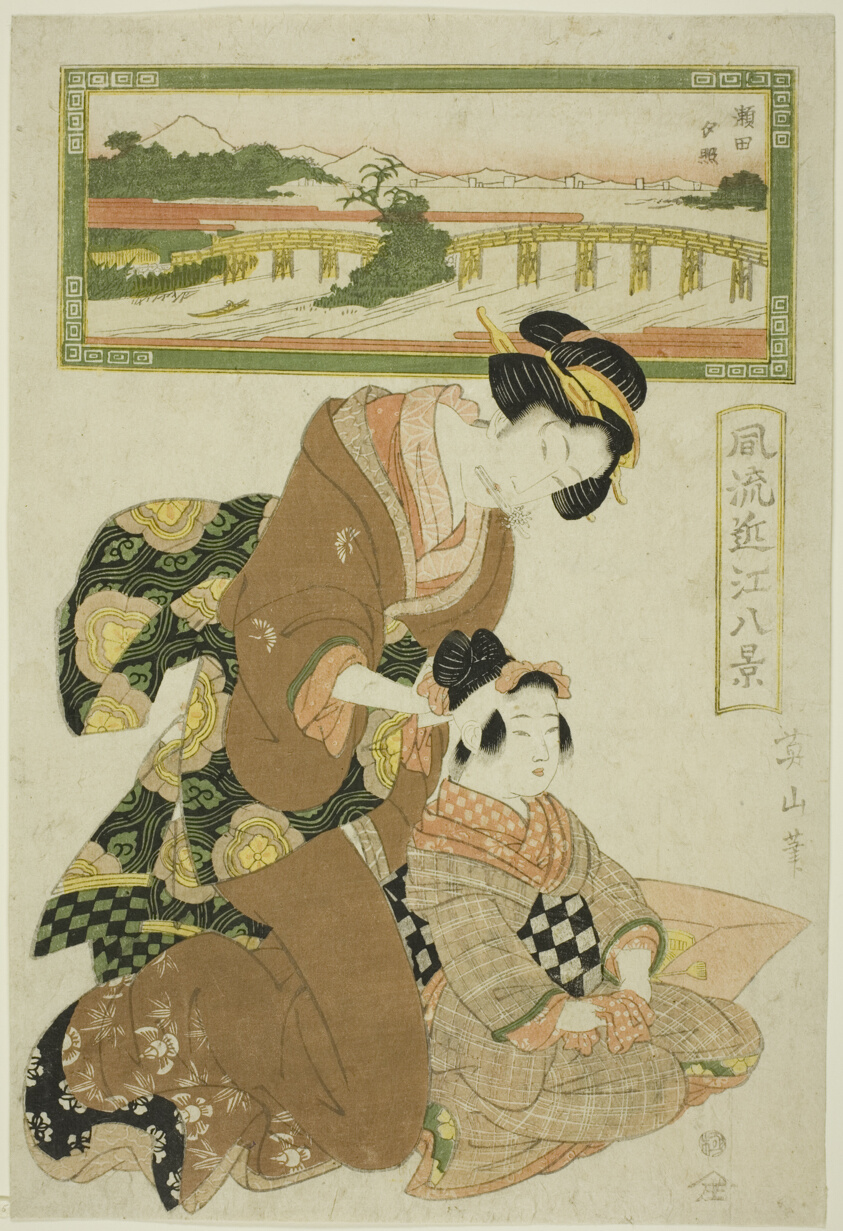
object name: Print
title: Evening Glow at Seta (Seta sekisho), from the series "Fashionable Eight Views of Omi (Furyu Omi hakkei)"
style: Japanese (culture or style)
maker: Kikukawa Eizan (Japanese, 1787-1867)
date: c. 1814/17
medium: Color woodblock print; oban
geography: Japan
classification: ink or chalk wash; painting; asian art; print